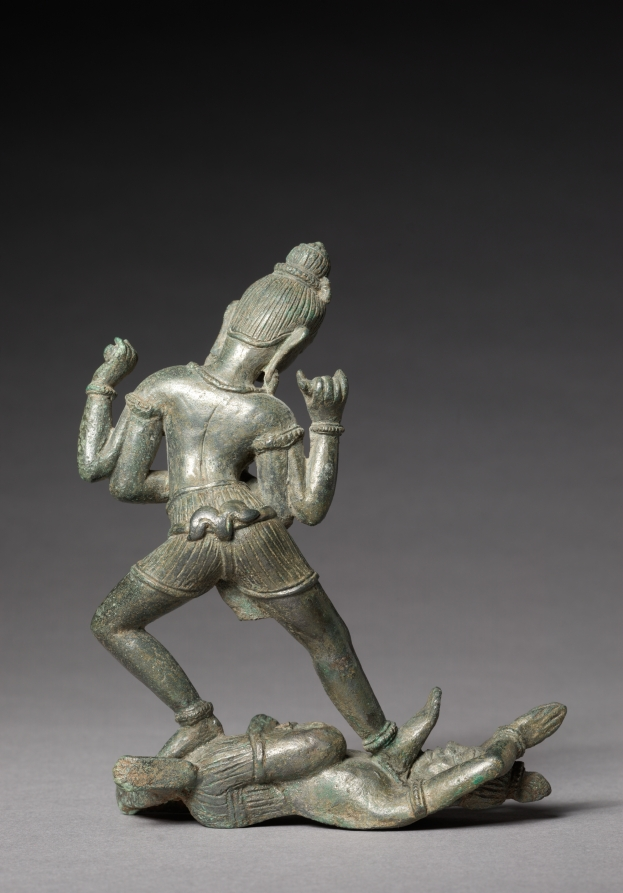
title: Shamvara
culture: Cambodia, Angkor, 11th century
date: c. 1100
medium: bronze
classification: Sculpture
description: An extremely rare bronze of a tantric Buddhist deity depicts the trampling of the personifications of the afflictions that keep beings cycling around the world of samsara, moving from one unhappy birth, death, and rebirth to another. This male figure, a prominent form of a tantric Buddha in Tibetan Buddhism, is four-armed and probably once held a vajra and bell in his crossed hands.